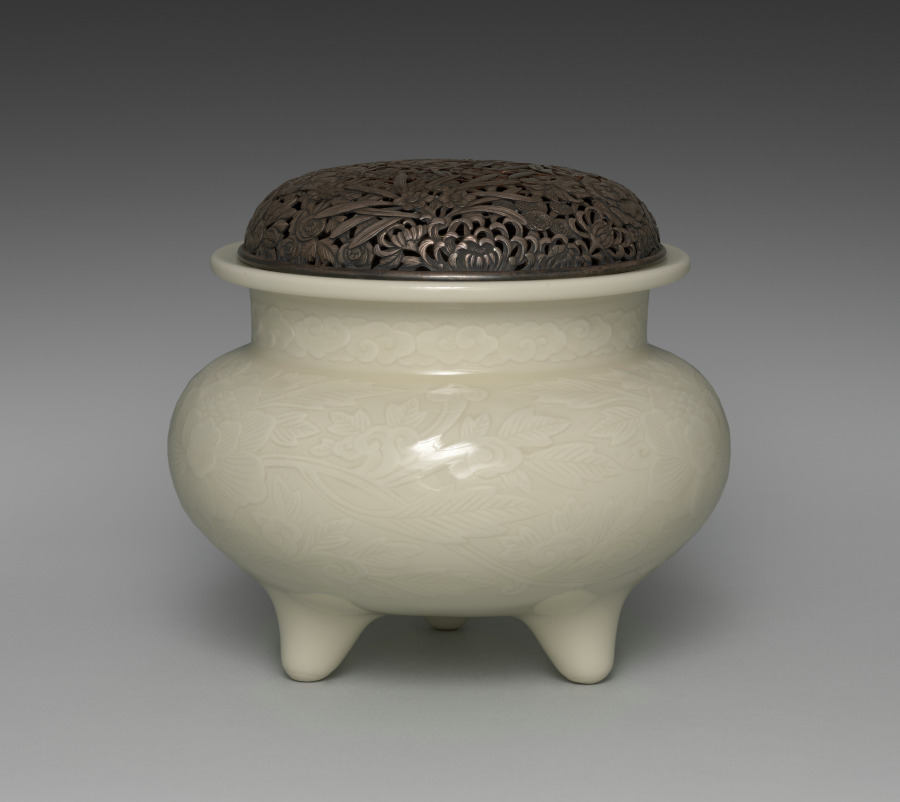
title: Incense Burner with Peony and Cloud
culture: Japan, Meiji period (1868–1912)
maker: Seifū Yohei III (Japanese, 1851–1914)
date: 1914–46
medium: Porcelain with molded and incised design, pale pink glaze, and floral openwork silver lid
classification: Ceramic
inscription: 清風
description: Yohei IV’s incense burner has a scrolling floral pattern of peonies and nyoi staff-head forms around the body and a band of clouds around the collar. These are done in low relief, with incised lines marking the details in the flower petals and leaves. The silver lid has a proliferation of flowers, including lily, peony, and a variety of chrysanthemums. The box lid identifies the subtle pink over an ivory body as “dawn’s light[–glazed] porcelain” (shokōji). After he became an Artist of the Imperial Household, Yohei III created a number of glaze and clay combinations with what would have been considered Japan-focused names to be in alignment with his position as an artist representing the nation. Among them was a glaze called “dawn’s light pale [pink] color” (akebonoiro tansai), which he invented in 1895. It is possible that this incense burner is an example with this glaze, despite the slightly different name given on the box. While the name alludes to the Land of the Rising Sun, an epithet for Japan, the burner’s motifs remain very much drawn from the Chinese repertoire.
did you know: Seifū Yohei IV’s incense burner has a pale pink glaze named “dawn’s light.”